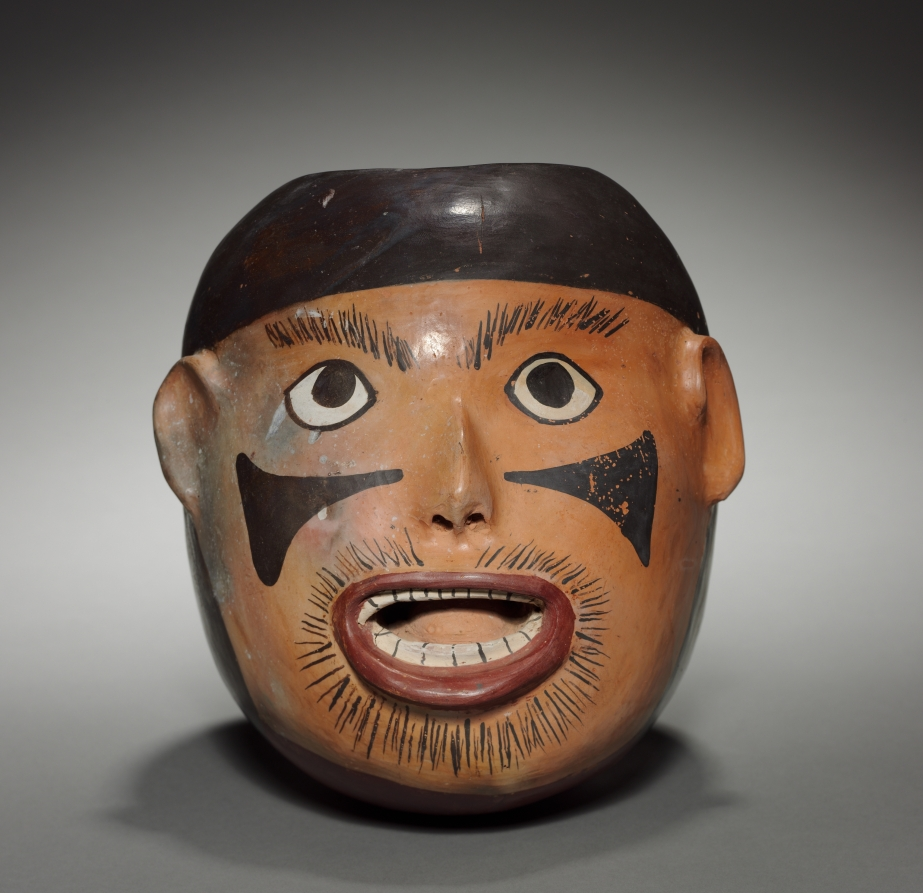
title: Severed Head Effigy Vessel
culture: Peru, South Coast, Nasca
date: c. 100–350 CE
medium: earthenware with colored slips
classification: Ceramic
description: The Nasca people were organized politically into small, competing chiefdoms, and warfare was common. This vessel represents a freshly severed human head (probably that of a captured and sacrificed prisoner) with staring eyes, gaping mouth, and blood-red underside. Modeling of the mouth cavity, tongue, and teeth lends the image a startling realism. Human sacrifice by decapitation was a central element of Nasca religion, essential to agricultural fertility. Severed heads were emptied and dried, then pierced through the forehead and suspended from a thick cord. Such preserved heads have been recovered from offering deposits and from tombs, where they were buried with their captors.